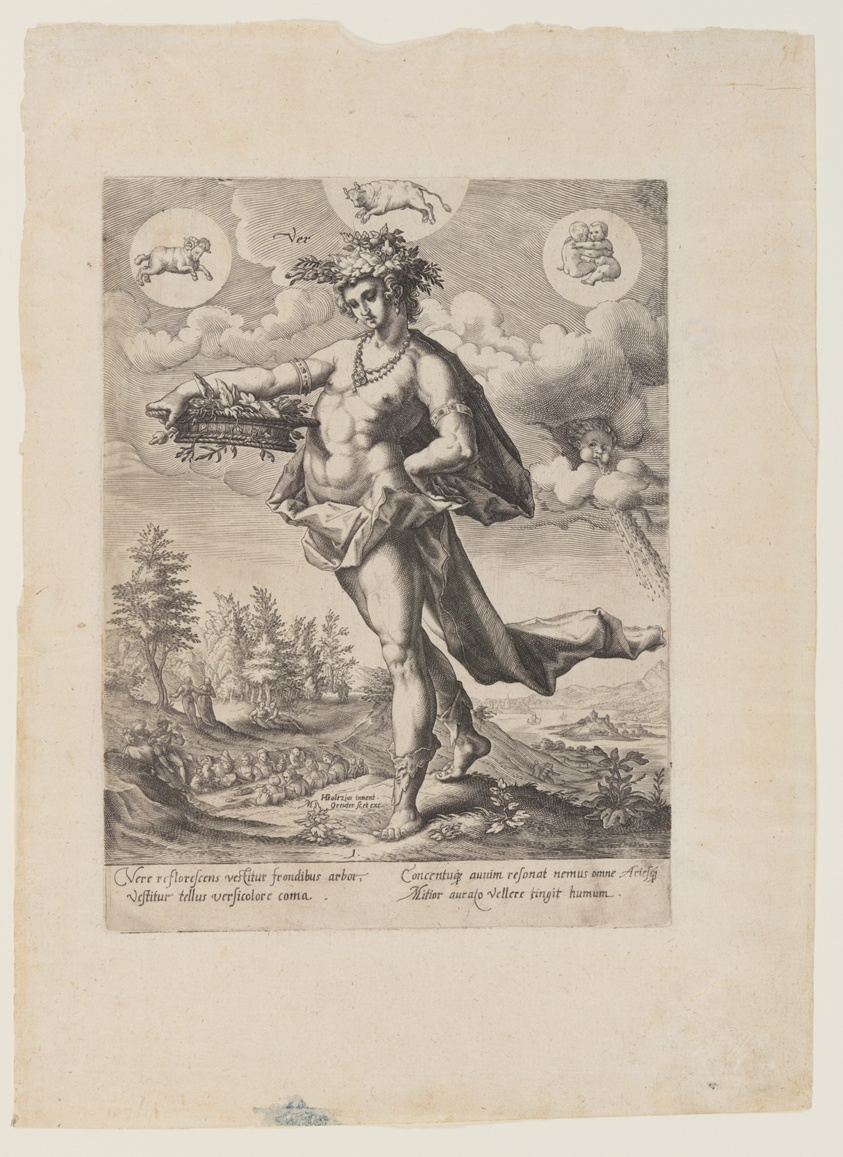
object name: Print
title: Spring, from The Four Seasons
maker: Matthäus Greuter (German, 1564 or 1566–1638); after Hendrick Goltzius (Dutch, 1558–1617)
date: c. 1589-1600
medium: Engraving on ivory laid paper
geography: Germany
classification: engraving; paper; print; prints and drawing